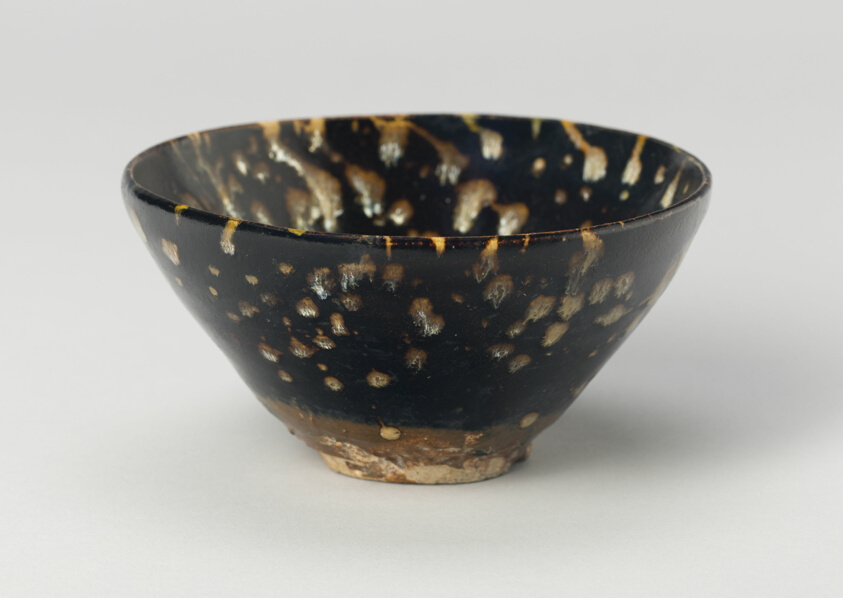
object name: Vessel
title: Teabowl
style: Chinese (culture or style)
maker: China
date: Jin dynasty (1115–1234), 12th century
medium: Northern blackware, Cizhou type; stoneware with dark brown glaze and overglaze russet flecks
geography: China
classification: drinking vessel; ceramics; vessel